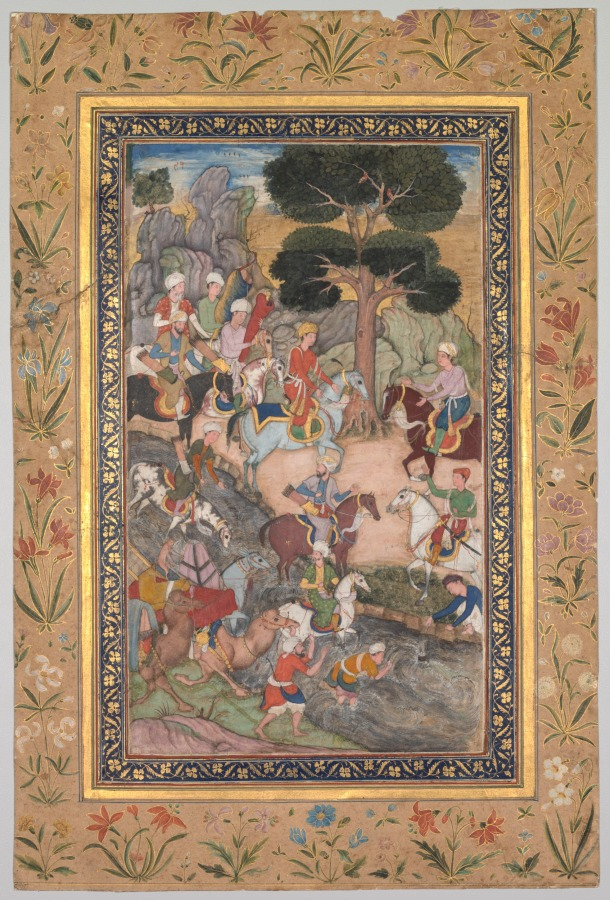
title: Babur meeting with Sultan Ali Mirza at the Kohik River, from a Babur-nama (Memoirs of Babur)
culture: India, Mughal school, 16th century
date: c. 1590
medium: Gum tempera and gold on paper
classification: Painting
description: Thirty years before he captured Delhi and founded the Mughal Empire, Babur began his expansionist activities at the age of 13, as depicted in this painting of an encounter that took place in 1496. Having traveled long distances across harsh dry terrain, Babur confronted one of his rivals who, like him, was angling to march on and conquer the illustrious city of Samarkand, the former capital of his ancestor Timur.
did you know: Camels carry collapsed tents to be pitched for nightly encampments and parties.